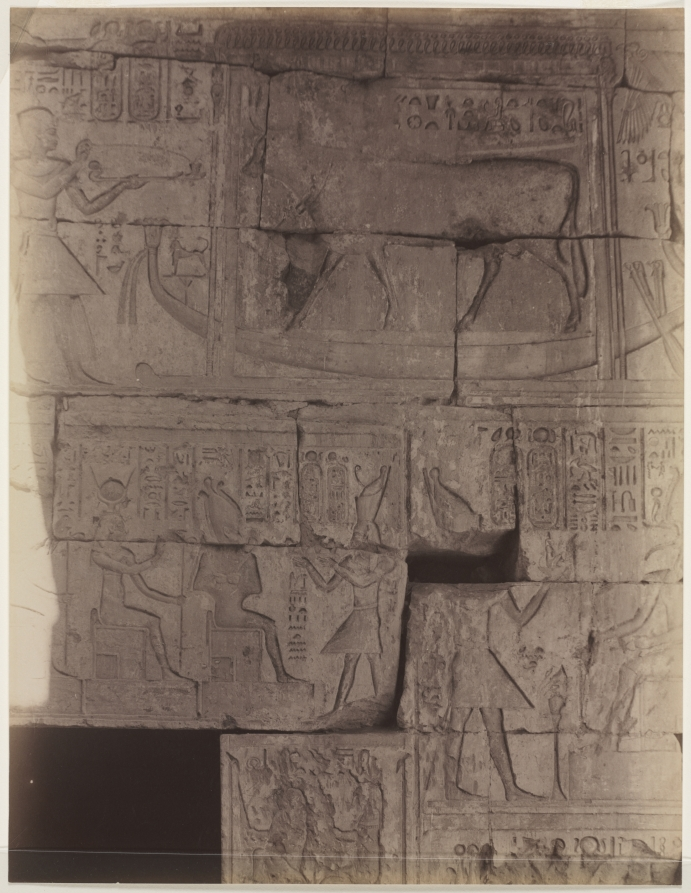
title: Deir el-Medineh, Sacred Barge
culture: England, 19th century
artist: Antonio Beato (British, c. 1825–1903)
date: c. 1870s - 1880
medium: albumen print from wet collodion negative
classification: Photograph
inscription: Written in pencil on verso: "7"; "AB-5858-Z"; "266/Der el Medineh/Barque Sacre"